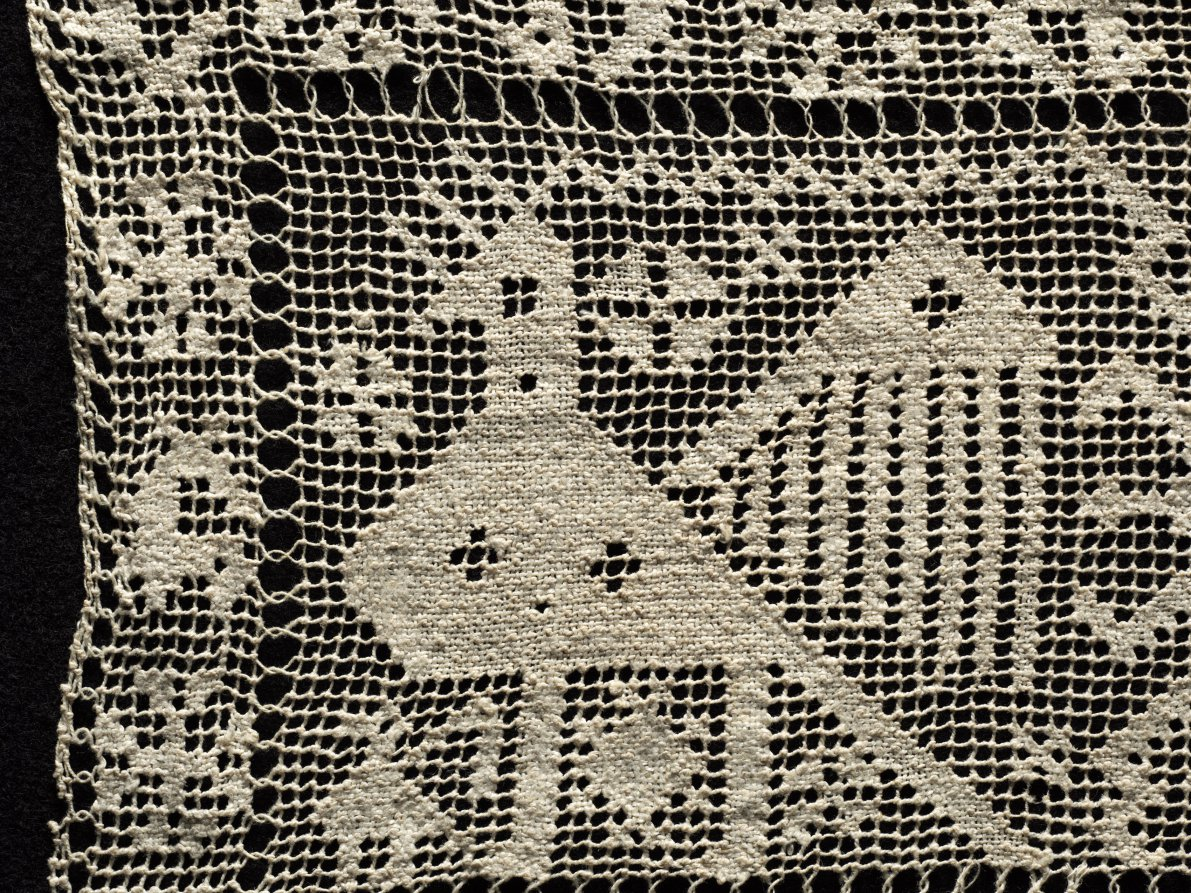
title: Panel with Birds, Flowers, and Suns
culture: Italy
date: 1500s–1600s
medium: Bleached linen (est.): needle lace, filet/lacis (knotted ground and darned in two directions)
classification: Lace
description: The repeated sun and cross motifs, representing Christ and the Crucifixion, suggest this lace panel may have been used to ornament a Christian vestment, perhaps worn by a clergy member.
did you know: Based on the ancient belief that the peacock’s flesh never decayed, they became a symbol of immortality.